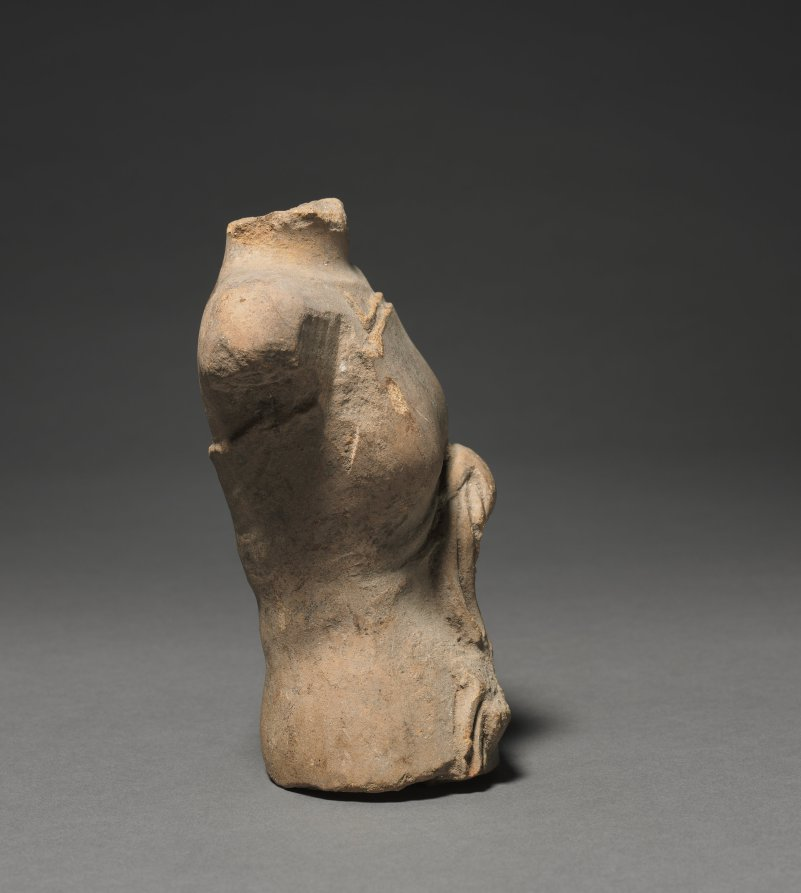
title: Female Torso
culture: Eastern Java, Majapahit Dynasty (1293-1478)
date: Majapahit Dynasty (1293–1478)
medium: terracotta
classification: Sculpture